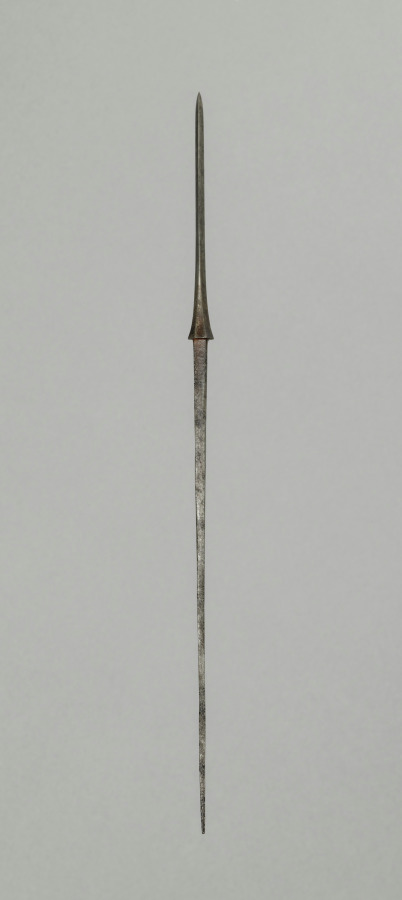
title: Arrow Point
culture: Japan, Edo period (1615–1868)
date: 1700s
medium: steel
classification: Arms and Armor